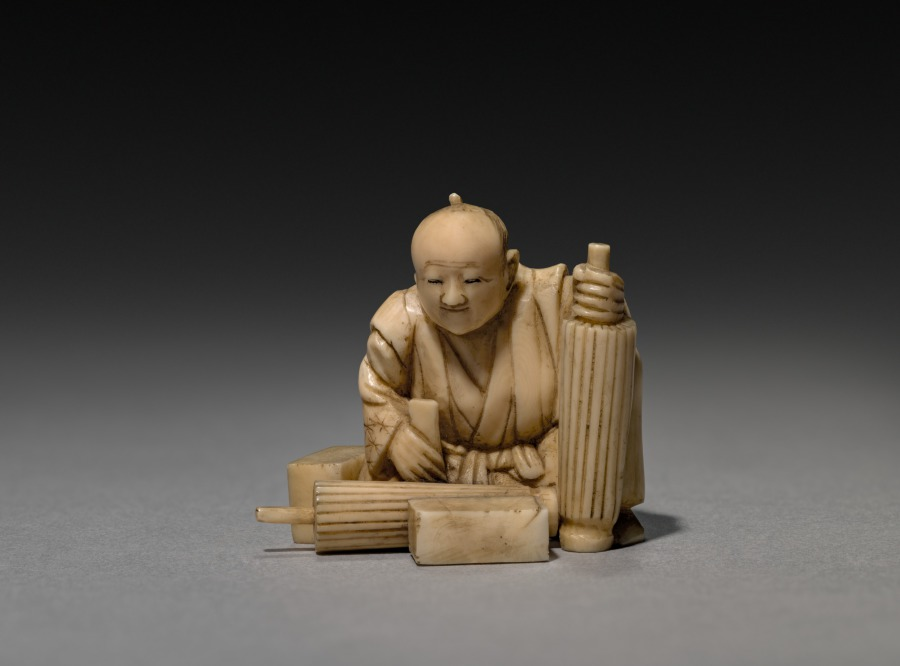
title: Parasol Vendor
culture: Japan, Meiji period (1868–1912)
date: late 1800s-early 1900s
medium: ivory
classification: Ivory